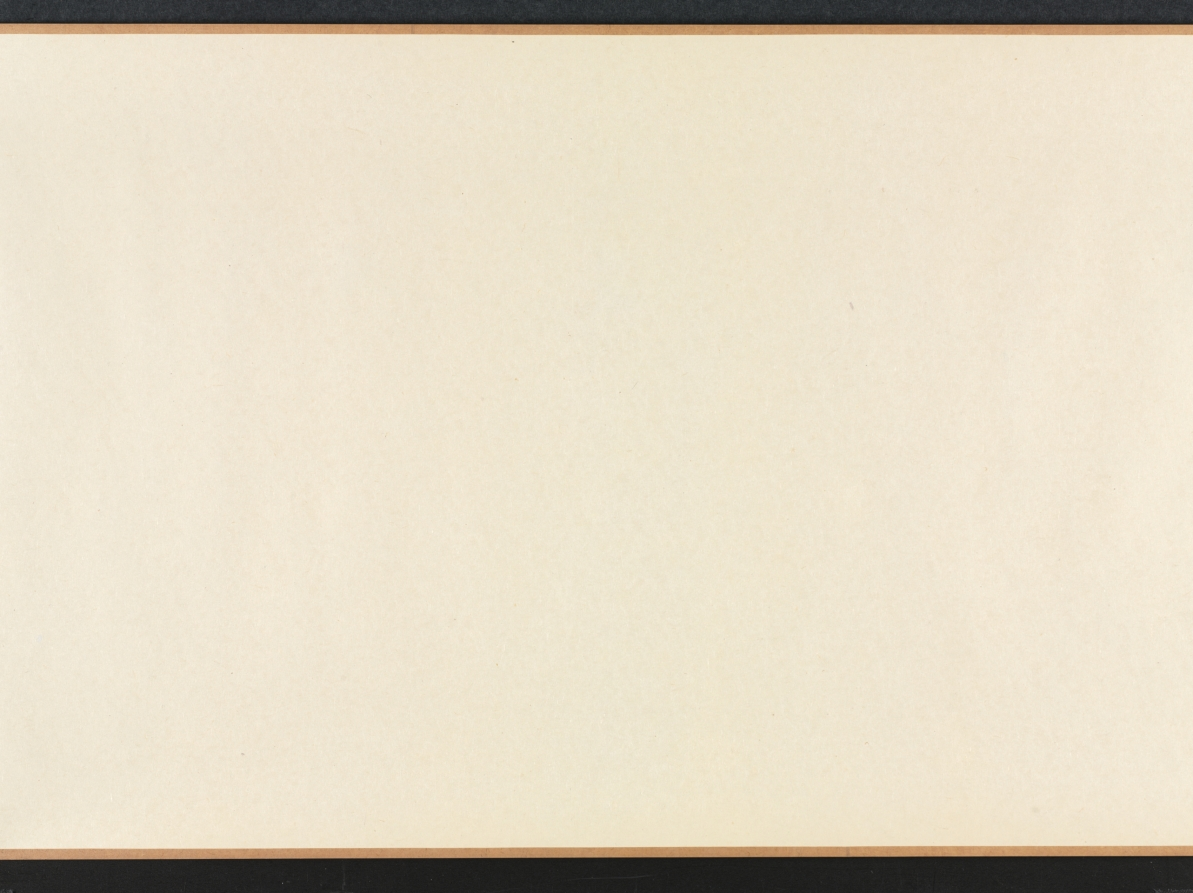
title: Hall of Lofty Pines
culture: China, Qing dynasty (1644-1911)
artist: Wang Hui (Chinese, 1632–1717)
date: 1703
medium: handscroll; ink and color on paper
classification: Painting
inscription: [題] 松喬堂圖 康熙癸未夏六月, 海虞耕煙散人王翬畫。[印]王翬之印; 石谷. [左下] 來青閣; 耕煙野老時年七十有二.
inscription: 松喬堂圖一卷，海虞石谷王君為靜海近公厲少司冦公作也。圖成于癸未之夏。未幾而公遂仙去。公令子今編修君南湖屬余題跋其後。余與公同官侍從，交契最深。側見公之清修純德，蔚為聖天子所眷重。侍直內廷，密勿贊襄，幾二十餘年。蒼生之所以受賜，士林之所以沐德者，天下莫能窺，在廷莫能悉。而公卒不言。以故宸衷日益契，恩禮亦日益渥。雖年逾懸車，時有歸老之念。而上固不聼公之去。其所謂松喬堂者，御書以賜公者也。蓋以松比公之清風勁節，而歲寒不改，經霜彌茂。則又以期公之壽考未有艾焉。公知此身未易乞，而山林槃磵之樂，止可寄諸寤思。此松喬堂圖之所由作也歟。石谷此圖，結構精密，筆墨超邁。其寫樹木之蒼蔚，堂宇之靚幽。恍見摩詰輞川樂天廬山之勝。獨惜公未得一日徜徉故園以償其願。即繪於圖亦未得以永其趣，此編修君之所以眷眷不忘也。雖然千歳之松喬，下蔭百畝，上以修棟梁之需。然則上當日名堂之意，不更望於後之人襲其芘而養其材也哉。吾願編修君之寶斯圖。并望君之塗塈丹雘，大其堂構也已矣。 康熈丙戍重陽三日，雲間王鴻緒跋。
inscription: 10 additional seals: 1 seal of Li Duna 勵杜納 (1628–1703); 4 seals of Zha Ying 查瑩 (jinshi of 1766); 5 seals of Li Yun (dates unknown).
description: Wang Hui 王翬, a leading painter in the orthodox school of the early Qing dynasty (1644–1911), was commissioned to paint this landscape with a country estate for Li Duna 勵杜納 (1628–1703), vice minister of justice in Emperor Kangxi’s court. The emperor had honored Li by granting him a piece of calligraphy with the name of Li’s retirement retreat, “Hall of Lofty Pines.” He drew a comparison between pines and Li’s upright character, resilience, and longevity. Wang Hui’s painting was supposed to allow Li to imagine living in a beautiful, secluded compound among the hills and pines. Sadly, Li died before seeing the completed painting and before receiving the emperor’s permission to retire. The landscape begins with peaceful riverbanks and low hills. The pines around the estate in the middle of the handscroll are truly lofty, some stretching even beyond the frame of the painting. Li Duna, the estate’s owner, is shown twice in his serene mountain retreat: first approaching the entrance to the compound with two servants at the right, and then later in the scroll, to the left, reading in the comfort of an inner room.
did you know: One servant carries the estate owner's carefully wrapped qin, a type of zither.